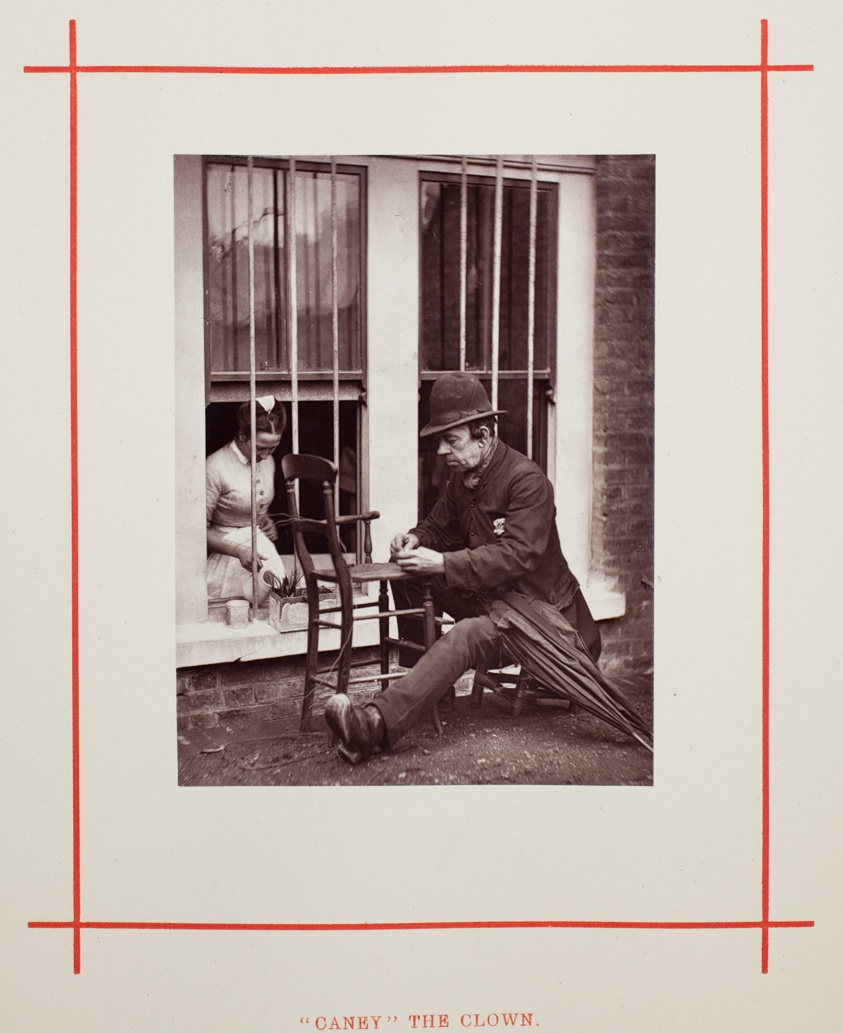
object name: Photograph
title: "Caney" the Clown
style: 19th century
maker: John Thomson (Scottish, 1837–1921)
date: 1877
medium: Woodburytype, from the album "Street Life in London"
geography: Scotland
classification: photograph; photography